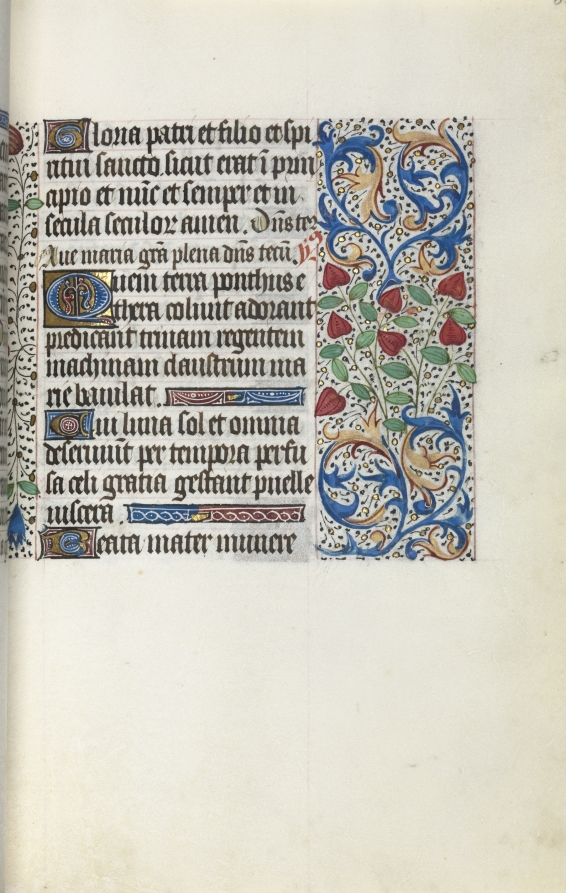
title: Book of Hours (Use of Rouen): fol. 30r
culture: France, Rouen, 15th century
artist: Master of the Geneva Latini (French, active Rouen, 1460–80)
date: c. 1470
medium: ink, tempera, and gold on vellum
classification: Bound Volume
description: In the late 1400s and early 1500s Rouen was an established and important center of book production. The city’s cathedral had a wealthy chapter that spent large sums of money to commission books and to maintain its extensive library. The stationers and booksellers would have likely been concentrated in or near the cathedral precinct. This artist, named after a manuscript now in Geneva, was Rouen’s principal illuminator during the second half of the 1400s.